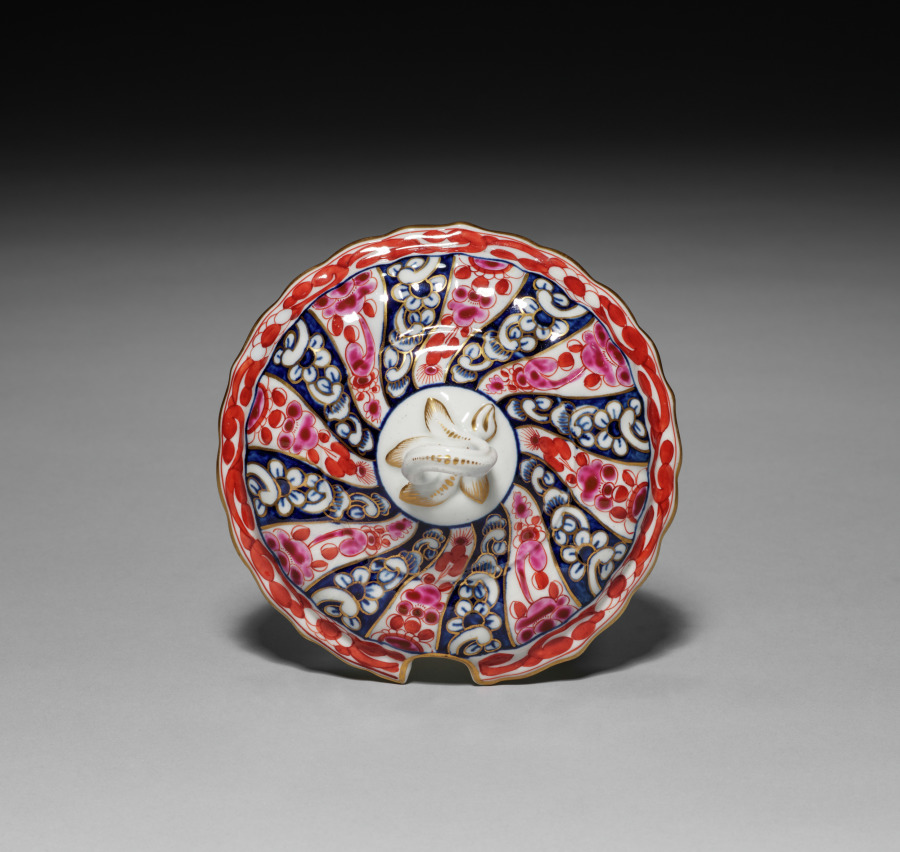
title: Cover for a Bowl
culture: England, 18th century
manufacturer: Worcester Porcelain Factory (British, established 1751)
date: c. 1770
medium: porcelain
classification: Ceramic